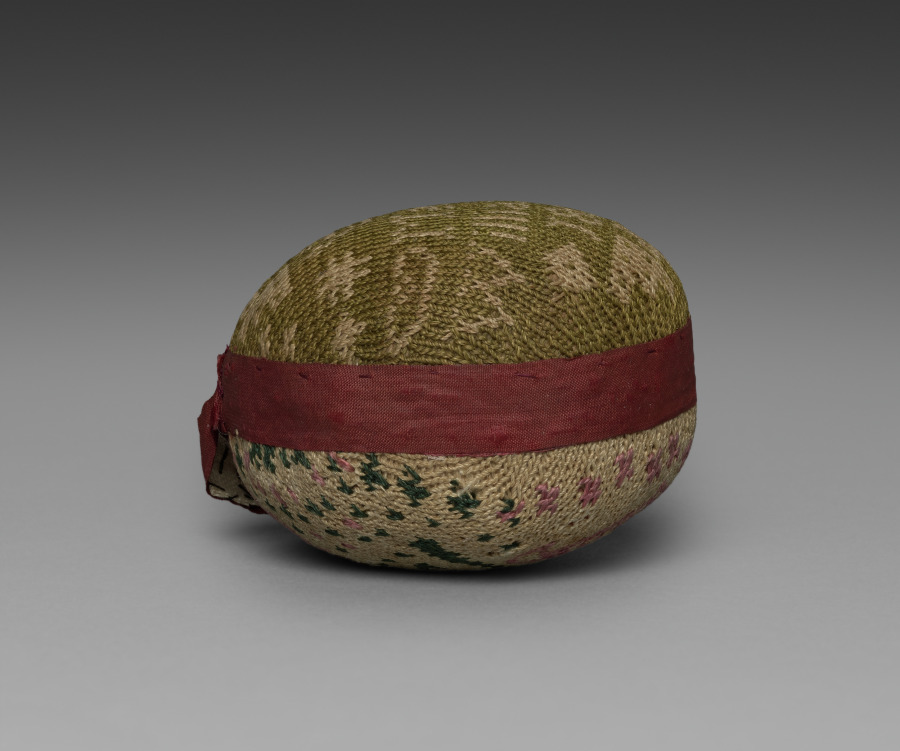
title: Pin Cushion Sampler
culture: England, 19th century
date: 1809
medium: Silk, knitted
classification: Sampler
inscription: "MARY WILLIAMSON 1809."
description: There is an inscription knit into this pin cushion, with the name Mary Williamson and the date 1809.